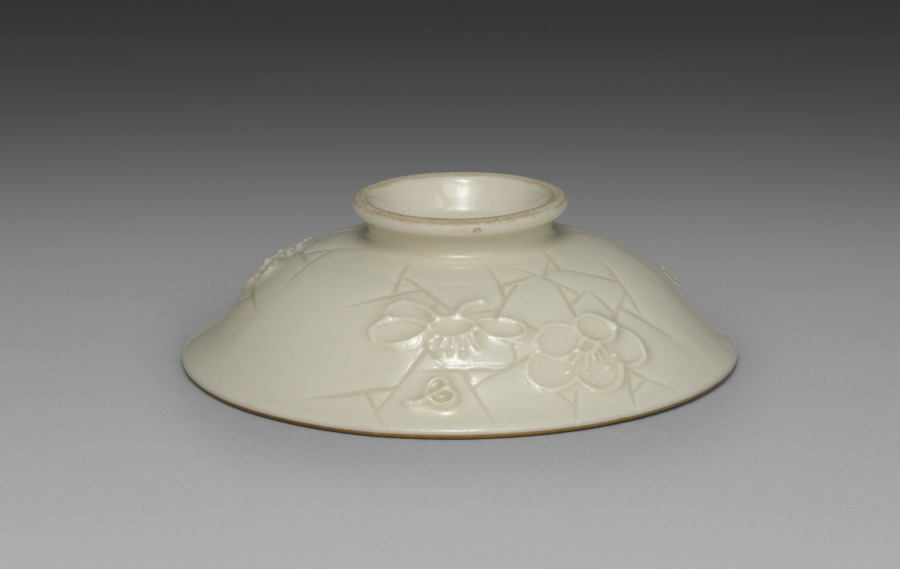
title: Cover for a Bowl from Dining Set with Plum Blossoms and Cracked-Ice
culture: Japan, Meiji period (1868–1912)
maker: Seifū Yohei II (Japanese, 1844–1878)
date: c. 1875–78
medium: Porcelain with molded designs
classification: Ceramic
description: Each item in this set has a delicate low-relief design of flowering plum branches over scattered, intersecting lines meant to resemble the cracked-ice surface of a frozen body of water and is signed on the base in gold pigment. While Yohei II produced many fine works in underglaze blue, like those produced by Kiyomizu Shichibei, he also made works in quite different styles later in his career, from the early 1870 s. In 1873, he was appointed purveyor to the Industrial Center of Kyoto Prefecture, a designation associated with Kyoto’s efforts to reach an international market through the port of Kobe; and from 1875 until his death, he was involved in national-level projects to present Japanese ceramics across the world. It was during this period that Yohei III was apprenticed to Yohei II, and it has been suggested that this set may in fact be an early example of Yohei III’s work, which he signed with his teacher’s name. Decorated with flowers resembling Japanese textile motifs, the set calls to mind the design of Yohei II’s pair of vases with plum blossoms in the Victoria and Albert Museum. Here, the elaborate trees created for a formal public exhibition setting have been translated into the approachable blossoms of the genteel domestic environment. While the designs are consistent across the pieces, each raised flower petal and pistil and each incised line in the ice was done by hand, so the cups, bowls, and dishes are similar yet unique. The bottoms of two boxes once identified the set’s owner, but the information has been deliberately obscured with black ink. However, inscriptions still visible appear to indicate two occasions, once at the end of July 1886 , and once again in June 1916 , when parts of the set were requested from Hokura in Niigata Prefecture. The location corresponds to a neighborhood in the present-day city of Jōetsu. The surname Tsuji 辻 also appears on a paper tag affixed to one of the box cloths. Future research may possibly reveal more about their provenance. A vase by Yohei III in a private collection combines the formal grandeur of the Yohei II vases in the Victoria and Albert Museum with the gentler design of this dining set, placing flowering plum trees against soft, scalloped-edge clouds resembling those in golden screens.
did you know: The dining wares have a creamy white coloration that the four boxes containing them identify as Korean in style.